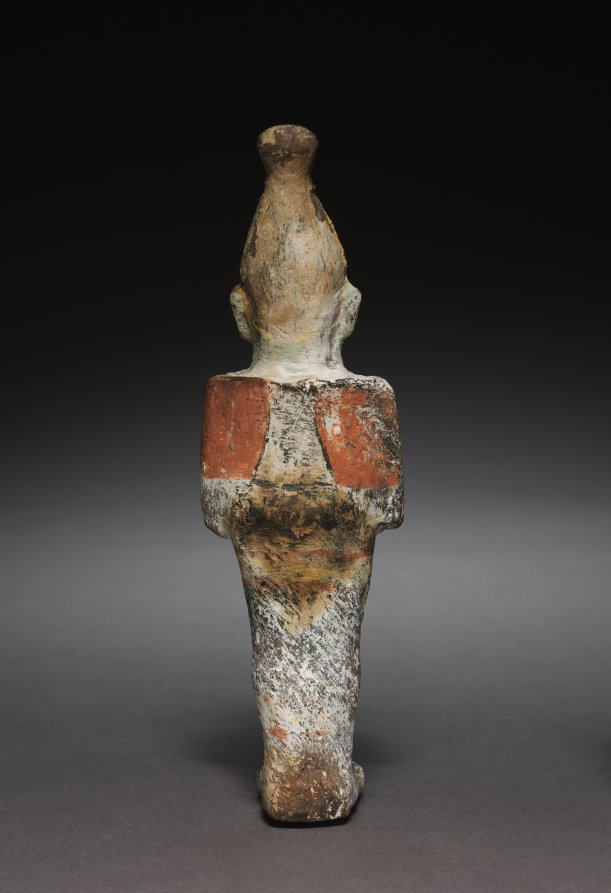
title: Statuette of Osiris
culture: Egypt, New Kingdom (1540–1069 BCE), Dynasties 19–20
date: 1295–1069 BCE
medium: painted terracotta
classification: Funerary Equipment